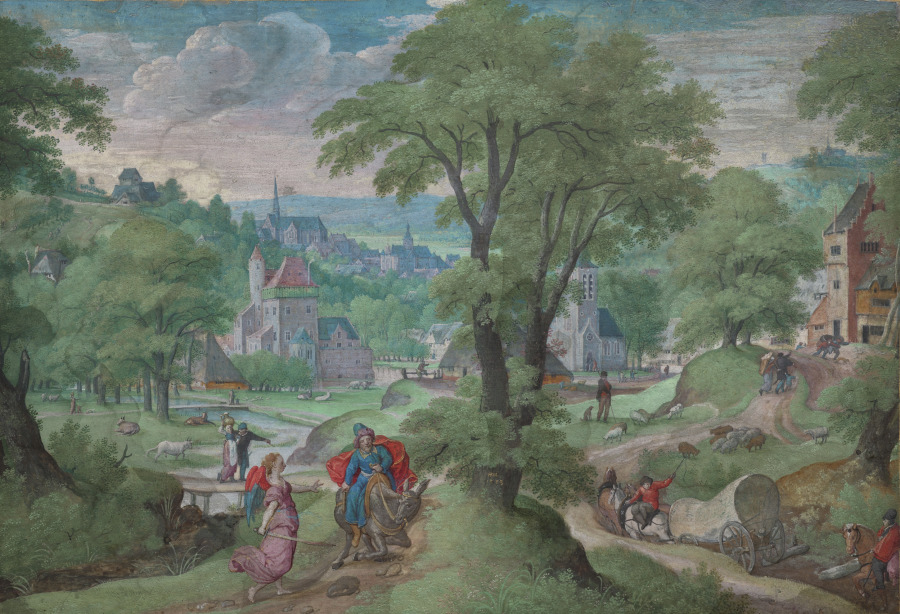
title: Balaam and the Ass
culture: Netherlands, 16th century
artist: Hans Bol (Flemish, 1534–1593)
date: 1583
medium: Gouache heightened with gold on vellum laid down on panel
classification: Drawing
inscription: Signed and dated in gold, on the trunk of the central tree: HBol 1583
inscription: bears old numbering on the panel verso: No 28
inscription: old inventory number on a label, verso: 268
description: While this small miniature, made with watercolor on parchment, depicts a scene from the Old Testament in the left foreground, its primary subject is the expansive rural scene, landscape, and distant hillside city beyond. Hans Bol combined realistic city views, based on his onsite observation, with imaginary scenes and narratives, appealing to his late-16th-century urban Netherlandish audience. The story of the Balaam and the Ass was associated with greed in the period. The miniature was likely paired with other scenes highlighting contemporary moral issues to be displayed together in a domestic setting.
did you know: This work is mounted on panel, suggesting that it was once inlaid into a piece of furniture or wainscotting in a wealthy 16th-century home.